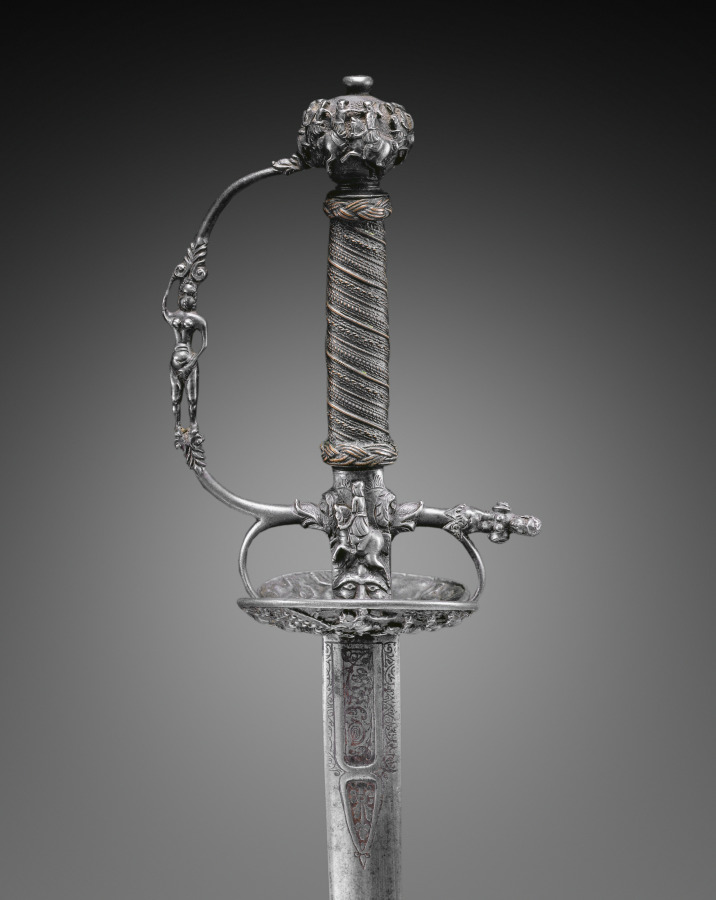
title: Small Sword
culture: Netherlands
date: c.1650–60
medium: steel, wood, copper wire; chiseled hilt; engraved blade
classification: Arms and Armor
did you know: Despite its small size the hilt and handle of this sword include numerous details, both figurative and geometric. Look for men on horseback, nude women, and a battle scene.